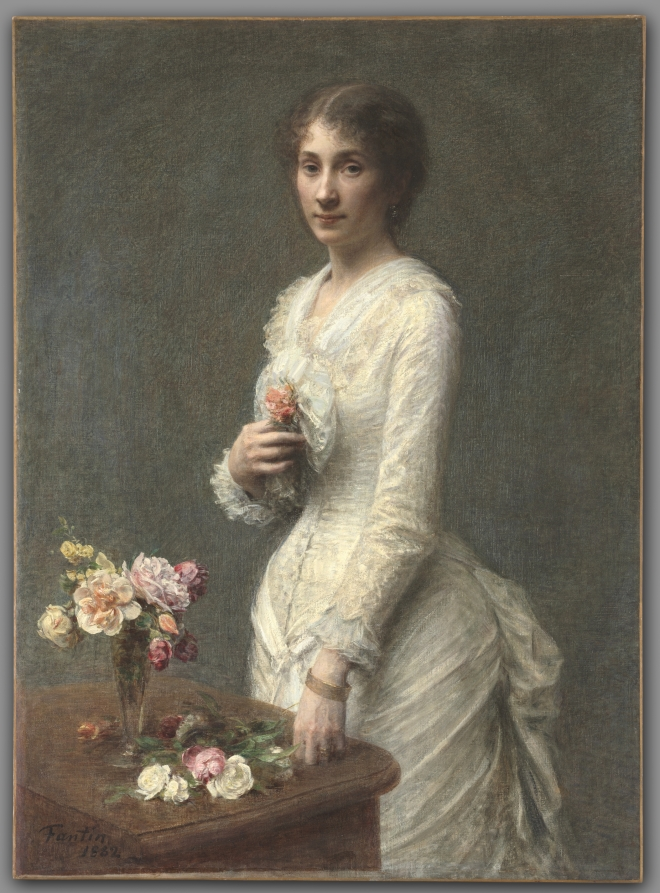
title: Madame Lerolle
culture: France, 19th century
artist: Henri Fantin-Latour (French, 1836–1904)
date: 1882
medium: oil on fabric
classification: Painting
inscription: Signed lower left: Fantin / 1882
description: The floral still life of roses enlivens the otherwise restrained palette used by the artist in this portrait. By the time he painted Madeleine Escudier Lerolle (1856–1937), wife of artist Henry Lerolle, the French artist Henri Fantin-Latour had established a steady clientele in Britain for his floral still lifes, arranged in modest vases and depicted against a neutral ground; he included such a still life in this portrait. Madeleine Lerolle and her daughter Yvonne are the subjects of another painting at the CMA by Albert Besnard in gallery 219.